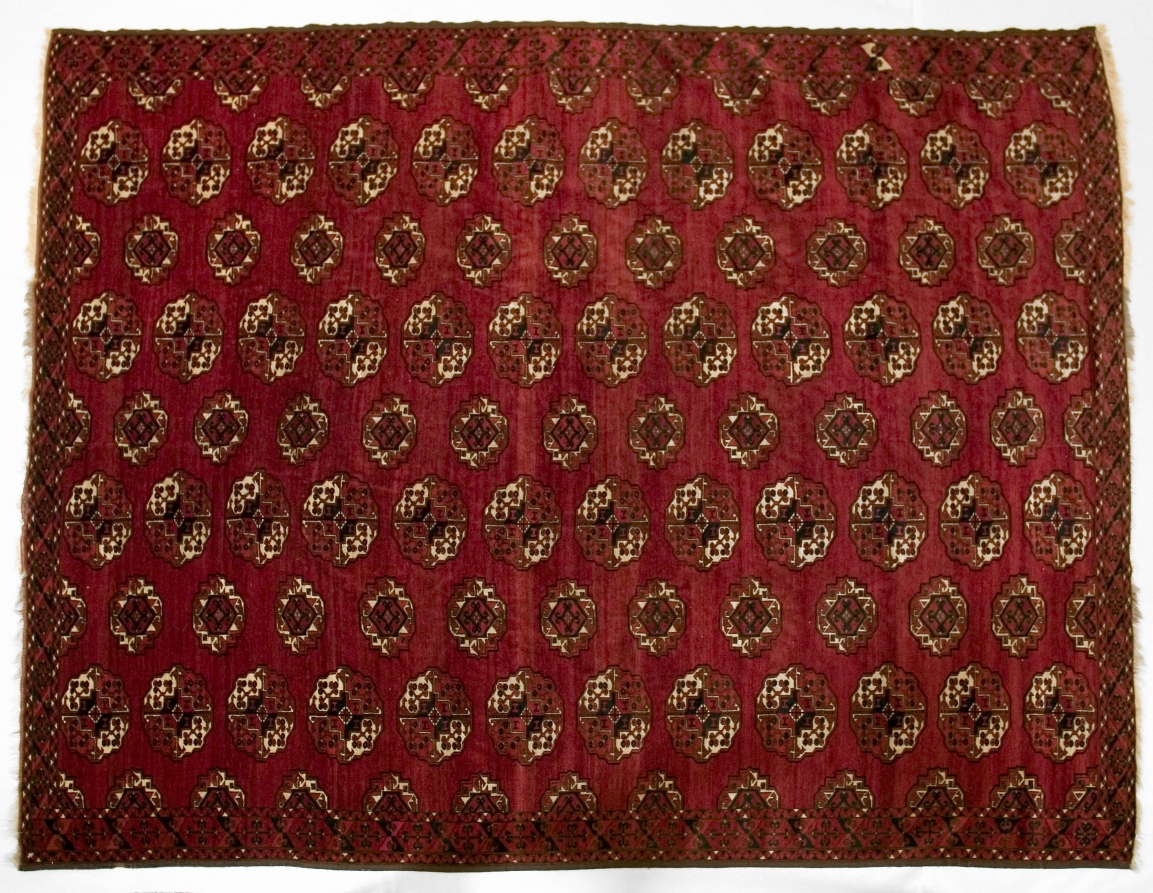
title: Turkmen Main Carpet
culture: Turkmenistan or Afghanistan, Saryk tribe, 19th century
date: 1870s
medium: Wool, silk; 171 symmetrical (Turkish) knots per square inch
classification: Carpet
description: Traditionally woven by women and girls, carpets are identified by fiber content, color, weave, and especially the type of rug knot-diagnostic features that are more reliable than designs. This rare carpet is admired for its brilliant color, lustrous wool, and spacious drawing. The main gul, or lobed motif, with three distinctive clover-leaf devices in each quadrant was a hallmark of the esteemed Salor tribe and often copied by other Turkmen tribes. The minor gul and the main border design were also duplicated. Only the minor borders with triangles in contrasting colors are Saryk hallmarks.